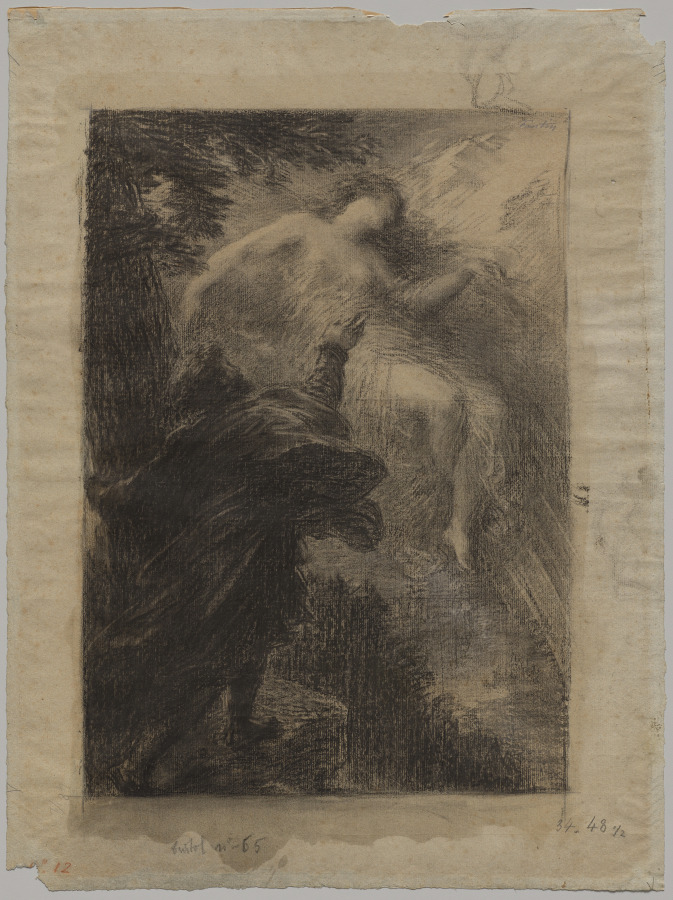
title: Fairy of the Alps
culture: France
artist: Henri Fantin-Latour (French, 1836–1904)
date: c. 1885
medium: charcoal with white chalk and black chalk, with framing lines in black crayon and squaring marks in graphite, on laid paper discolored to tan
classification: Drawing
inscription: signed, upper right, in charcoal: Fantin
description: Henri Fantin-Latour’s drawings featured imaginative compositions, often inspired by the music of contemporary German composers. This sheet relates to the symphonic work Manfred by Robert Schumann (1848), a drama in which Manfred encounters apparitions while mourning his lost lover. Fantin used layers of dark charcoal to evoke the emotional tenor of his subject and to translate the experience of listening to Schumann’s music using a visual medium.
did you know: This drawing relates to a print of the same year. Fantin used this sheet to work out his composition before completing a drawing on tracing paper, which was then used to transfer the image to a lithographic stone.